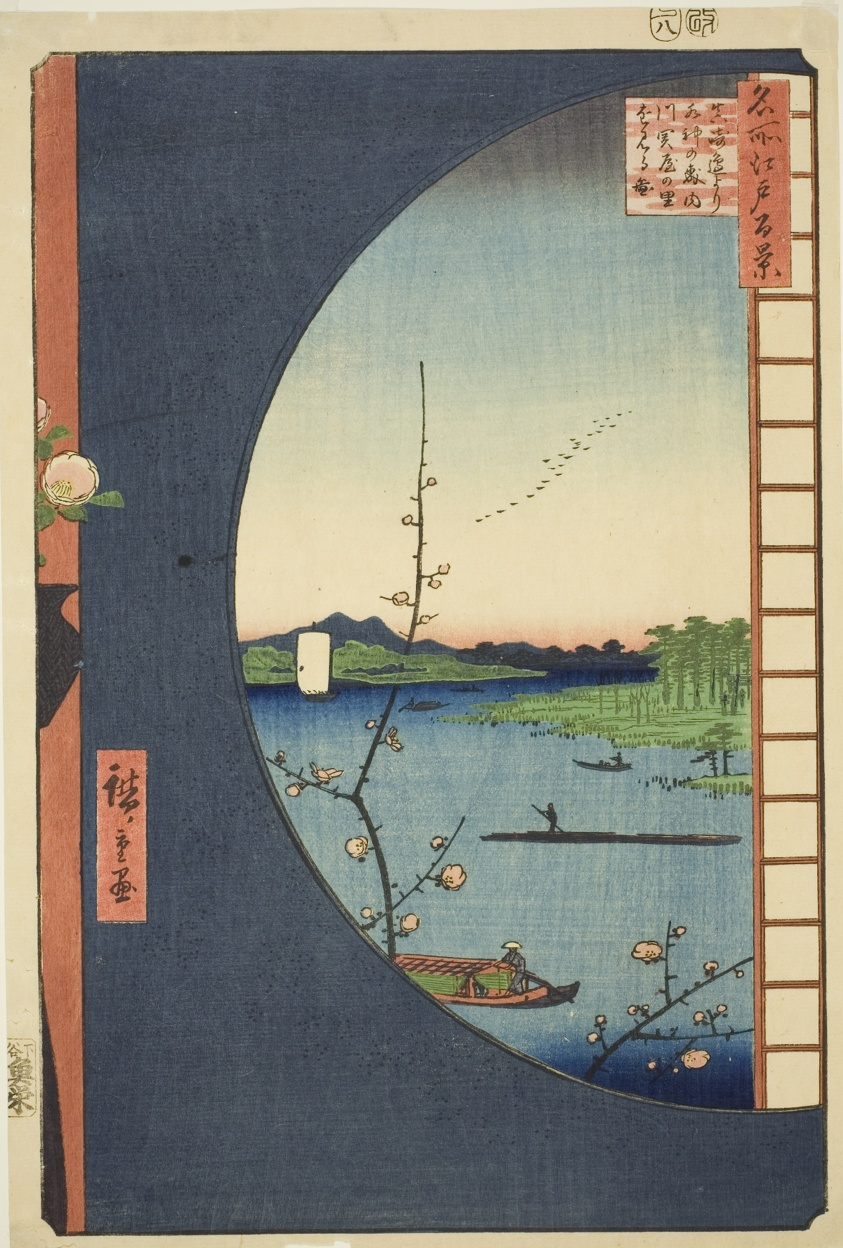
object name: Print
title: View from Massaki of Suijin Shrine, Uchigawa Inlet, and Sekiya (Massaki hen yori Suijin no mori Uchigawa Sekiya no sato o miru zu), from the series "One Hundred Famous Views of Edo (Meisho Edo hyakkei)"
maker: Utagawa Hiroshige 歌川 広重; Japanese, 1797-1858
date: 1857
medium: Color woodblock print; oban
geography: Japan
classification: woodblock print; print; asian art